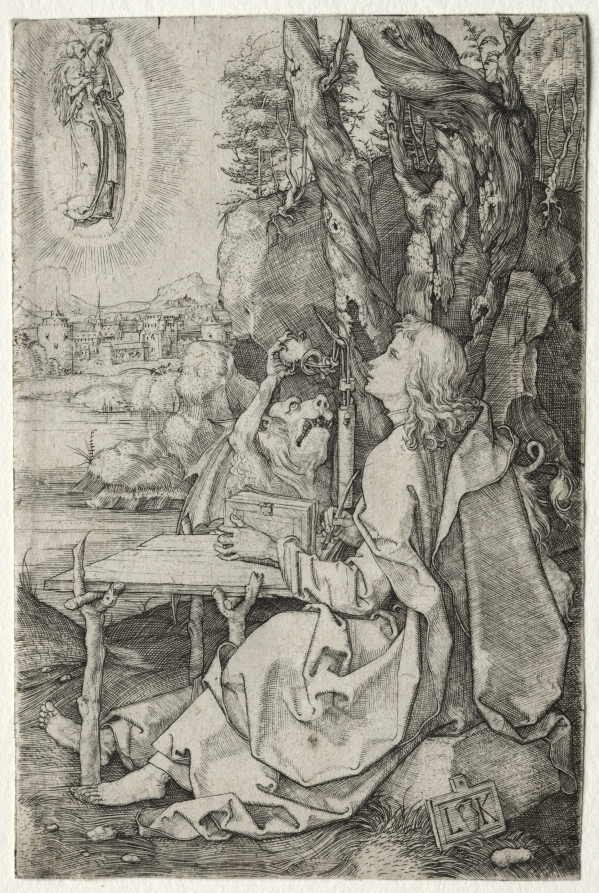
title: St. John on the Island of Patmos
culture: Germany, Nuremberg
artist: Ludwig Krug (German, 1490–1532)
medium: engraving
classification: Print